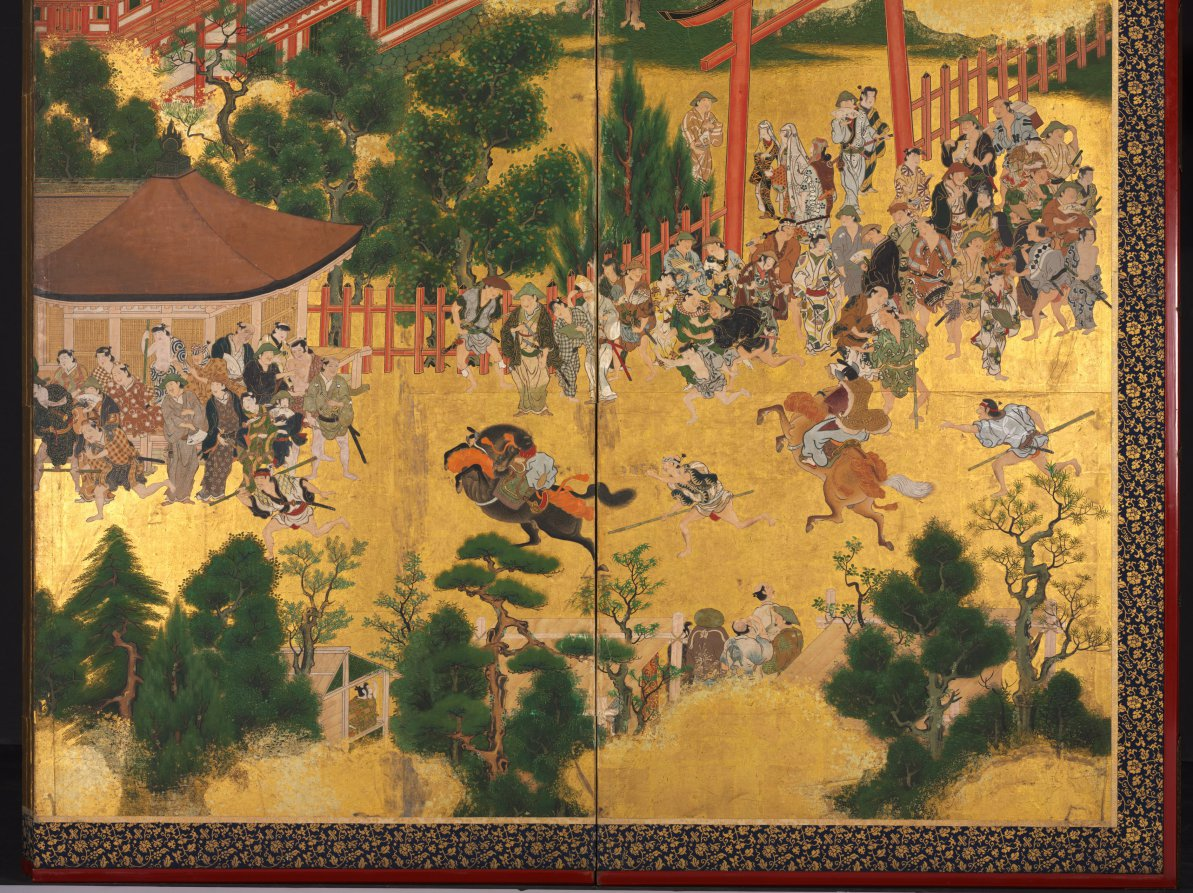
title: Horse Race at the Kamo Shrine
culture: Japan, Edo period (1615–1868)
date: early to mid-1600s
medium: One of a pair of six-panel folding screens; ink and color on gilded paper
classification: Painting